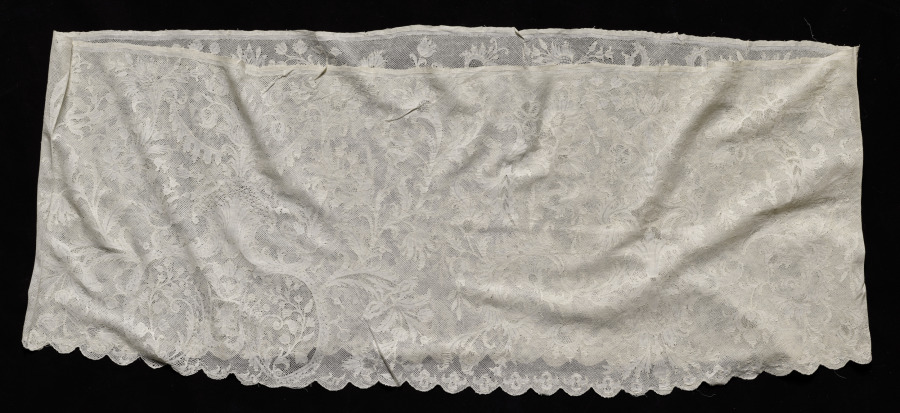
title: Lace Flounce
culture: Belgium (Flanders)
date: 1700–1720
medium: Linen: bobbin lace (mesh ground)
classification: Lace